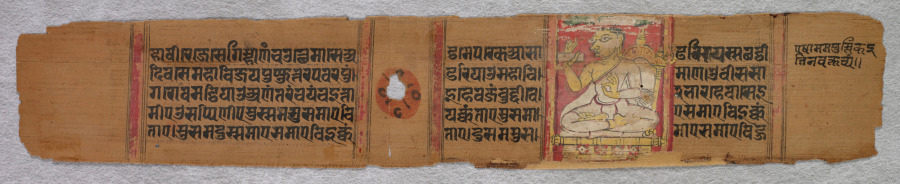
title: A Monk Preaching: Folio 2 (recto), from a Kalpa-sutra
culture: Western India, Gujarat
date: c. 1275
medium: gum tempera and ink on paper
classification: Painting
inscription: [[right margin]] esa mama pustika iti na vaktavyam